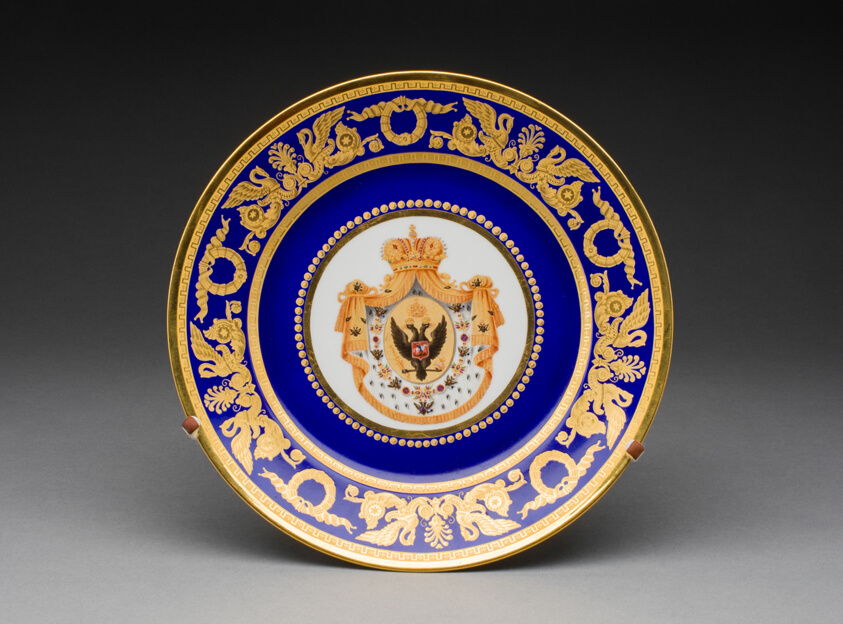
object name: Ceramics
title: Plate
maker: Russian Imperial Porcelain Factory (Russian, founded 1744)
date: 1855/81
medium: Porcelain, polychrome enamels, and gilding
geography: Saint Petersburg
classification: plate (general, dish); tableware; dish (vessel); porcelain; european decorative arts; ceramics